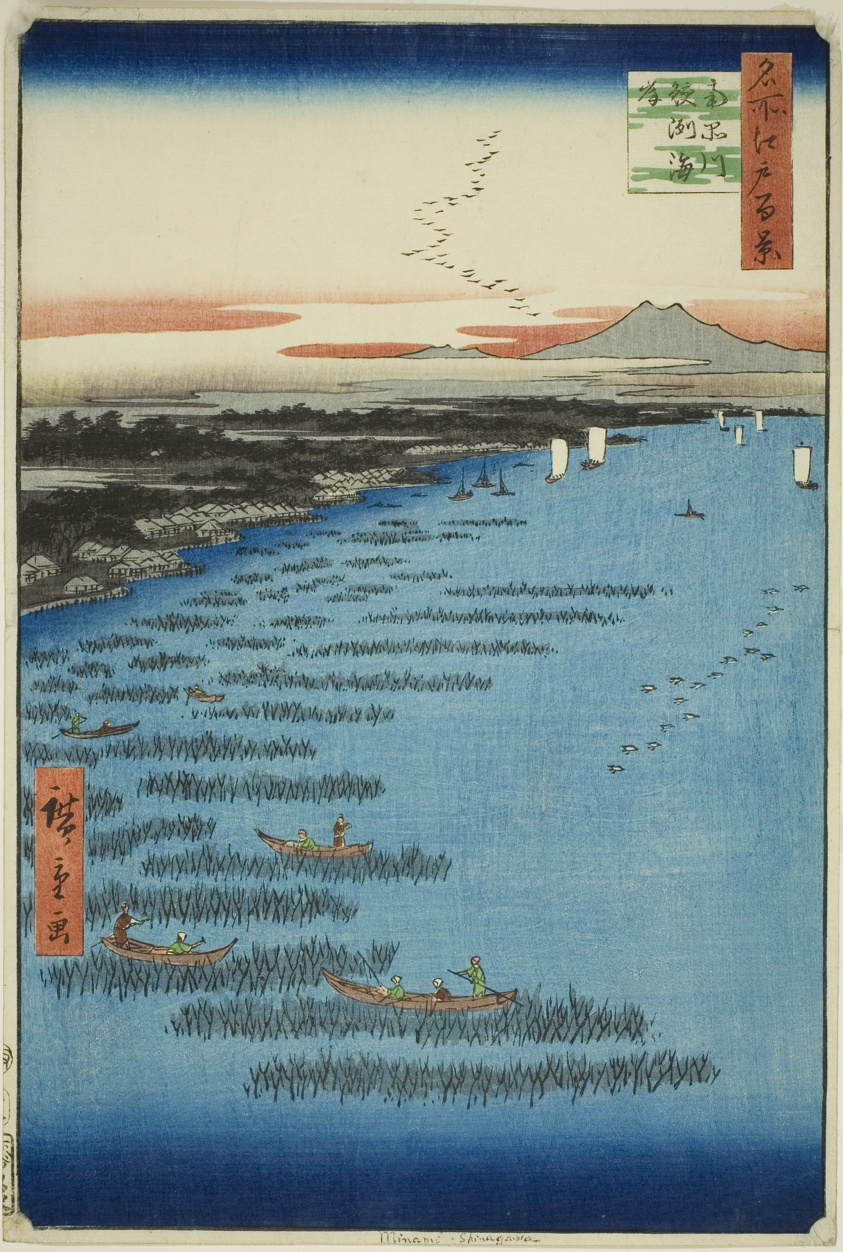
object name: Print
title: Samezu Coast in South Shinagawa (Minami-Shinagawa Samezu kaigan), from the series "One Hundred Famous Views of Edo (Meisho Edo hyakkei)"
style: Japanese (culture or style)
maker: Utagawa Hiroshige 歌川 広重; Japanese, 1797-1858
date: 1857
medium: Color woodblock print; oban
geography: Japan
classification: woodblock print; print; asian art